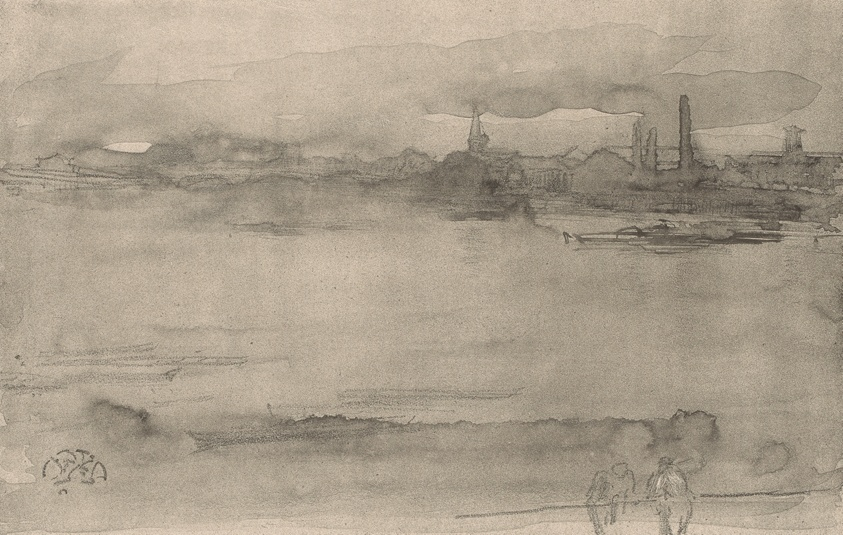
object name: Print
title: Early Morning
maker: James McNeill Whistler (American, 1834-1903)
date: 1878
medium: Lithotint with scraping, on a prepared half-tint ground, in black on cream wove proofing paper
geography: United States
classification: lithotint; lithograph; print; prints and drawing; paper